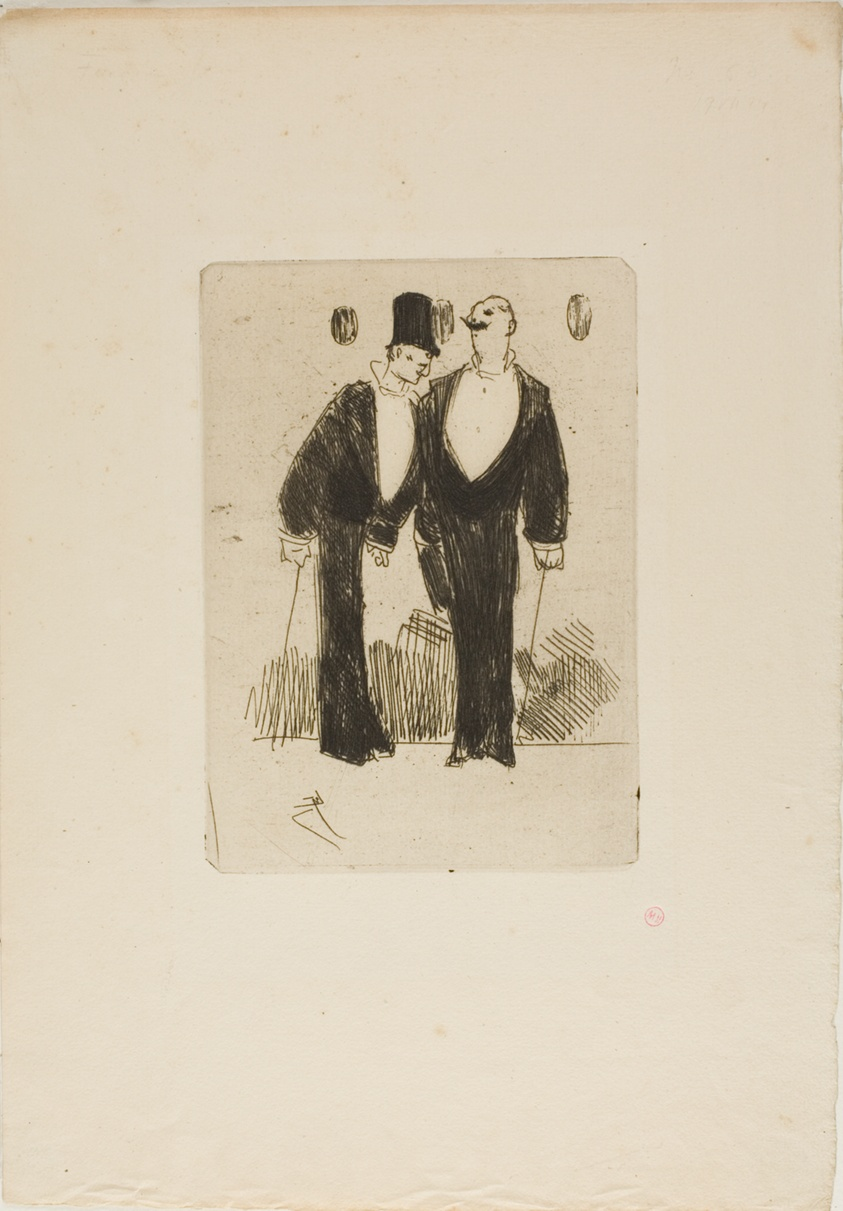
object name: Print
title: The Two Dandies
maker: Jean Louis Forain (French, 1852-1931)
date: 1876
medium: Etching on cream laid paper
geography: France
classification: etching; print; prints and drawing